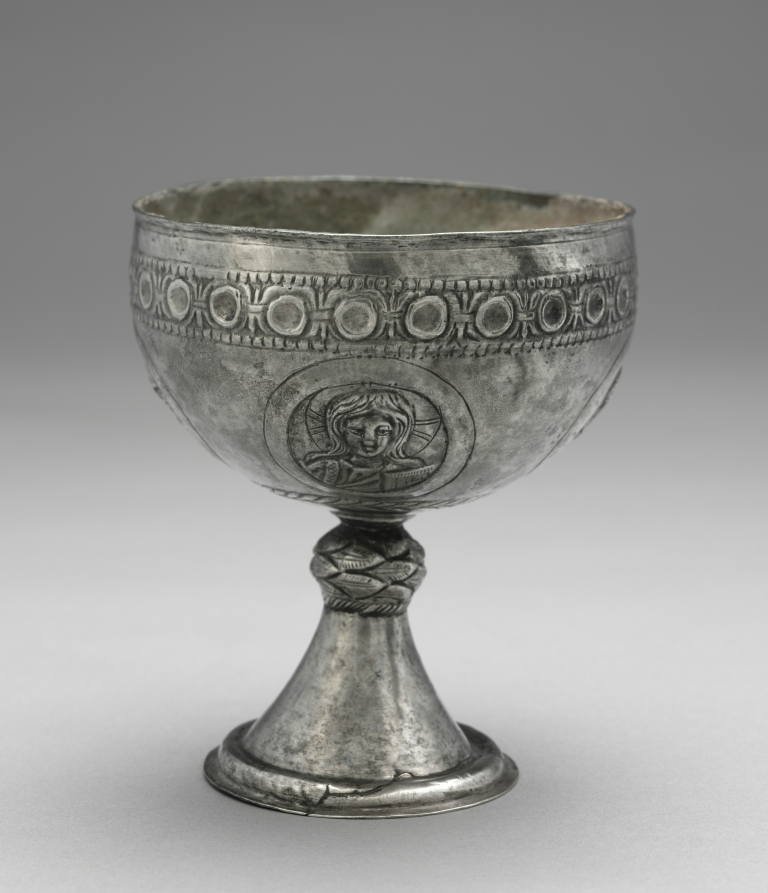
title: Chalice from the Beth Misona Treasure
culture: early Byzantium, Constantinople or Syria, Byzantine period, 6th-7th Century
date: c. 500–700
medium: silver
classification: Metalwork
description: These four liturgical silver vessels—a paten and three chalices (1950.378–81)—form what is now called the Beth Misona Treasure, named for the village in northern Syria for which the objects were made. While nothing is known about the exact location and circumstances of the treasure's discovery, the people of the village of Beth Misona were, like other Christian communities in Syria and Palestine, probably forced to bury their church silver to hide it from the Persians or Arabs, who conquered their lands in the first half of the 600s. The paten, which held pieces of Eucharistic bread used during Mass, is decorated with an engraved Latin cross surrounded by a dedicatory inscription that names the paten's donor—Domnos—and its original location, the church of Saint Sergios in Beth Misona. The chalices, which contained the Eucharistic wine used during Mass, feature broad cups decorated with portrait busts of Saints Peter and Paul, Christ, and the Virgin. One chalice bears a dedicatory inscription naming its donor—Kyriakos, Domnos's son—and the priest of the church that received the pious gift—Zeno.